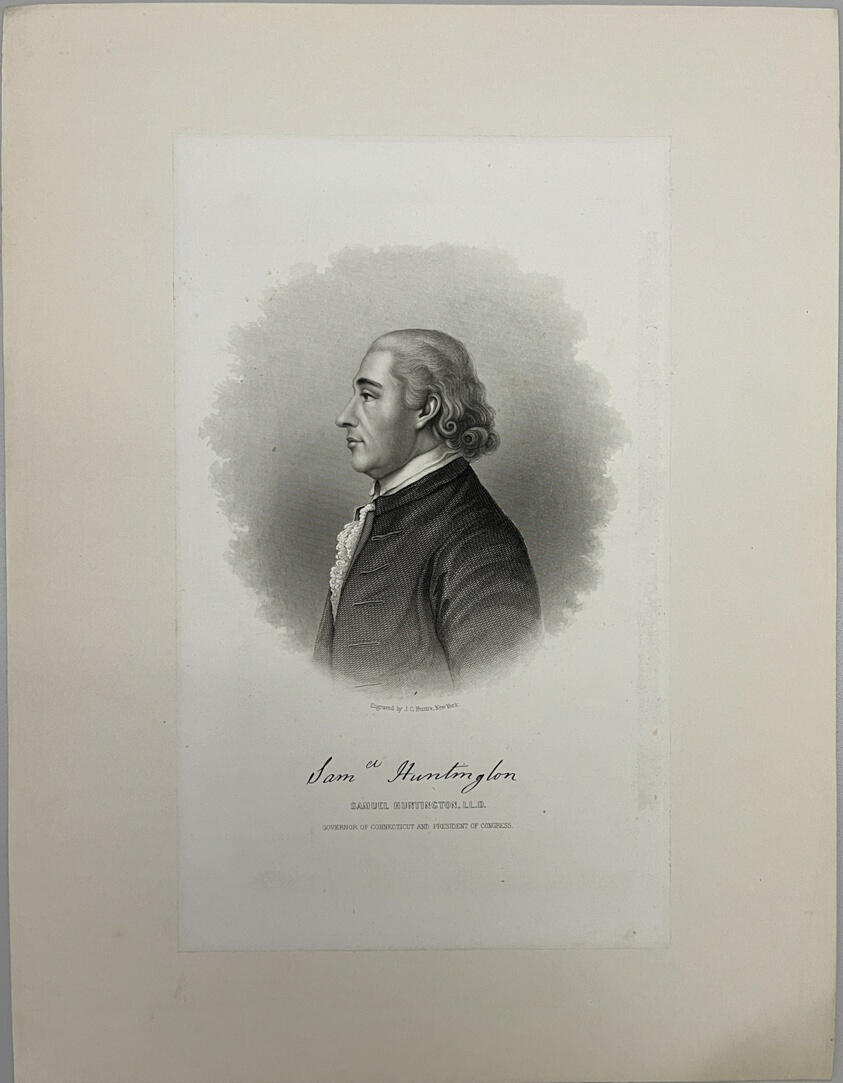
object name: Print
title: Samuel Huntington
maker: John Chester Buttre (American, 1821-1893)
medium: Steel engraving on paper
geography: United States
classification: reproduction; print; prints and drawing